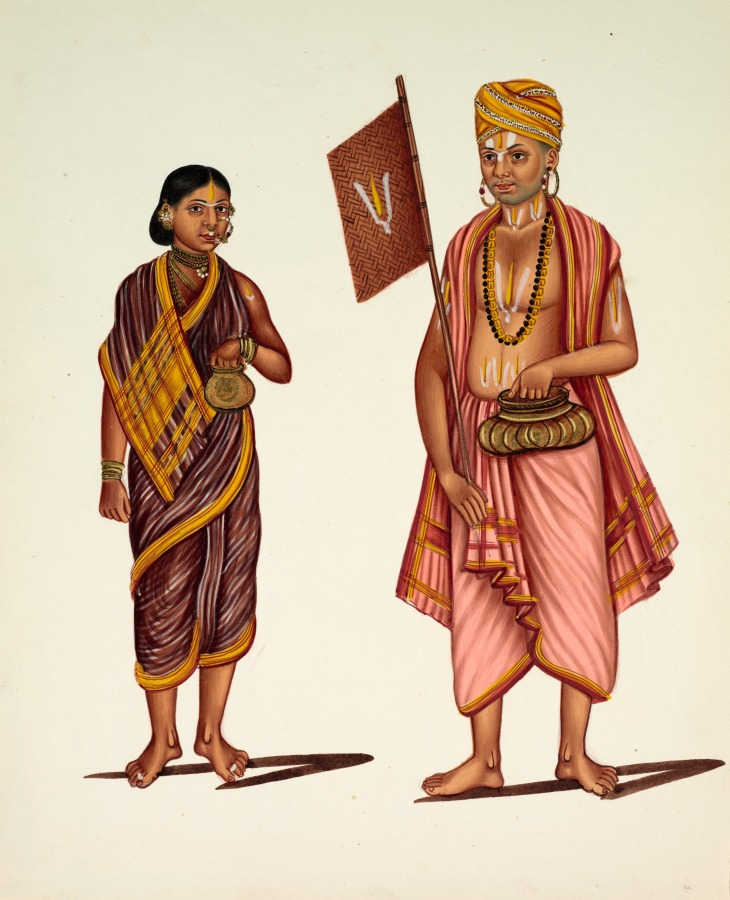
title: A Couple (from the series Costumes and Professions)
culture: South India, Tanjore, 19th century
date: mid-1800s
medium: Gum tempera, ink, and gold on paper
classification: Painting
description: This work was made by Indian artists for a member of the British East India Company. It was painted in the southern style of Company school painting, which is distinguished by its bold outlines, saturated color, and heavy application of gold. The priest on the right bears the sectarian markings of a follower of the Hindu god Vishnu on his forehead, chest, arms, and flag. A 19th-century British inscription on its surviving fly sheet, a protective cover of tissue paper, states that this priest made his living by praying to the “native doorway” early every morning. The survival of this commentary reveals how British collectors used these apparently objective depictions of costumes and professions to implicate Indian holy men in strange or even charlatan behavior.